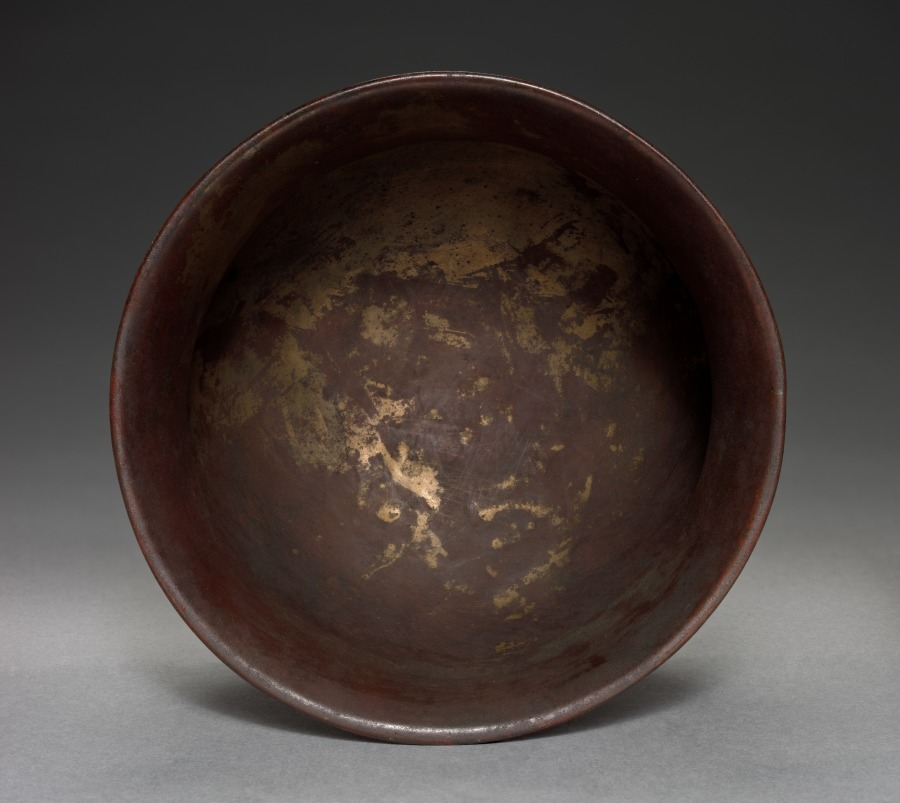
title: Deep Bowl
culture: Egypt, Greco-Roman period (332 BCE–395 CE), Ptolemaic dynasty (305–30 BCE) or modern forgery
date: 305–30 BCE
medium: bronze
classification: Vessels